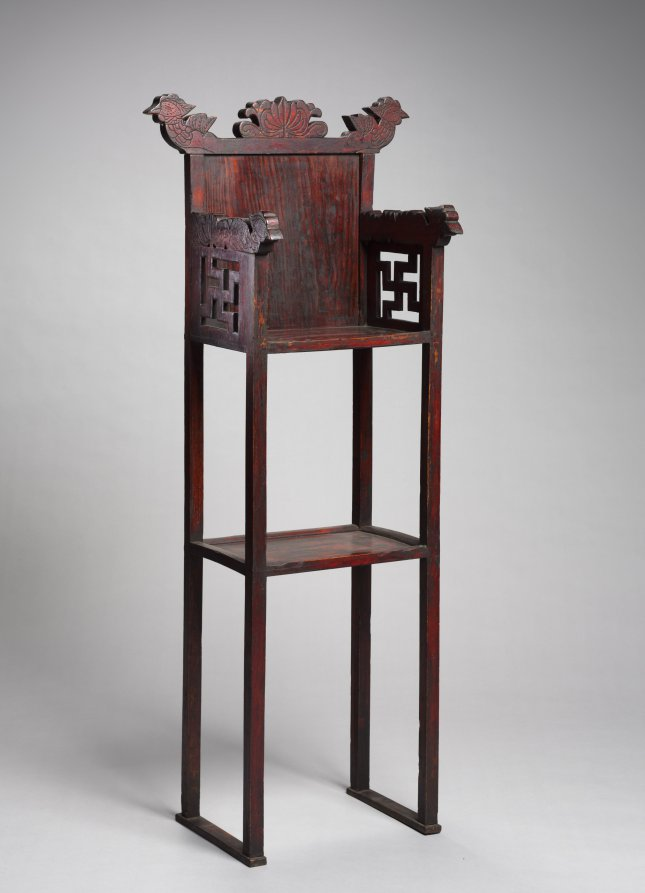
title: Altar High Chair (Kyo-Yi)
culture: Korea, Joseon dynasty (1392–1910)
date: 1800s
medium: pine nut wood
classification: Furniture and woodwork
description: Many homes in premodern Korean society had a memorial shrine for preparing and holding ancestral rites. Placed on the top of a tall chair, this miniature edifice (called the spirit house) served as a temporary residence for visiting ancestral spirits. On the table, a variety of delicacies such as fruits, rice, meat, and wine would be placed to treat those spiritual guests.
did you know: The belief in two types of souls, the spiritual and the corporeal, embodied the core concept of ancestral worship in traditional China and Korea. While the corporeal soul is believed to reside in the tomb, the spiritual soul, in the spirit house, guards his or her descendants.